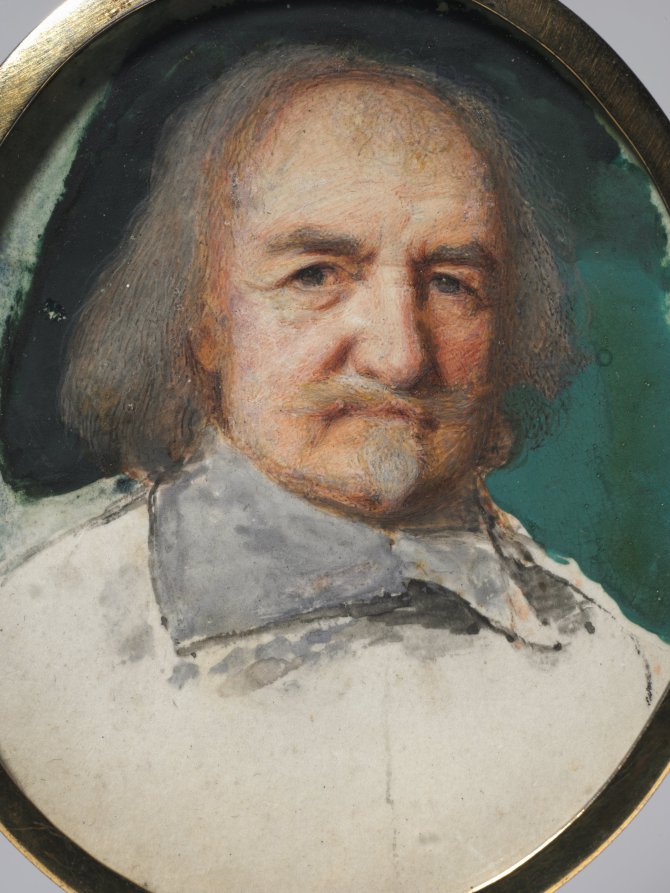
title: Portrait of Thomas Hobbes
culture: England, 17th century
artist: Samuel Cooper (British, 1608/09–1672)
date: c. 1660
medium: watercolor on vellum in a gilt metal frame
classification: Portrait Miniature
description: In his seventies when the portrait was painted, Thomas Hobbes (1588–1679) is turned slightly to his left, his eyes directed at the spectator. He has thin gray hair extending to his collar and a gray mustache and goatee. Only his head is finished; a thin gray wash loosely describes a plain, flat collar. Hobbes was born in Malmesbury, Wiltshire. In spite of humble parentage, he rose to prominence as a brilliant linguist and author of the 1651 book Leviathan, a seminal work of social contract theory that advocated for government led by a strong sovereign. As a royalist he was forced to flee England when the civil war broke out in 1642, and he resided in France until the war’s end in 1651. He was a friend of Cooper, who painted his miniature on at least two occasions.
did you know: A replica of Cleveland’s miniature was painted by Lady Margaret Bingham, Countess of Lucan.